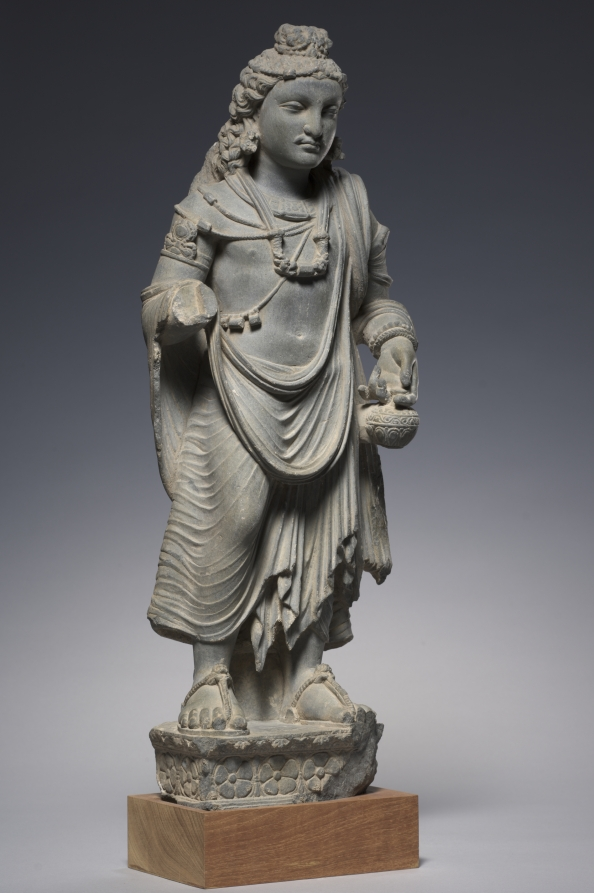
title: Maitreya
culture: Pakistan, Gandhara, Kushan period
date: c. 200s CE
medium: gray schist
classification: Sculpture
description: The water bottle in his left hand indicates that this figure depicts the bodhisattva Maitreya. It is thought that Maitreya will reach enlightenment after the teachings of the Buddha have been forgotten, in order to spread the teachings again.